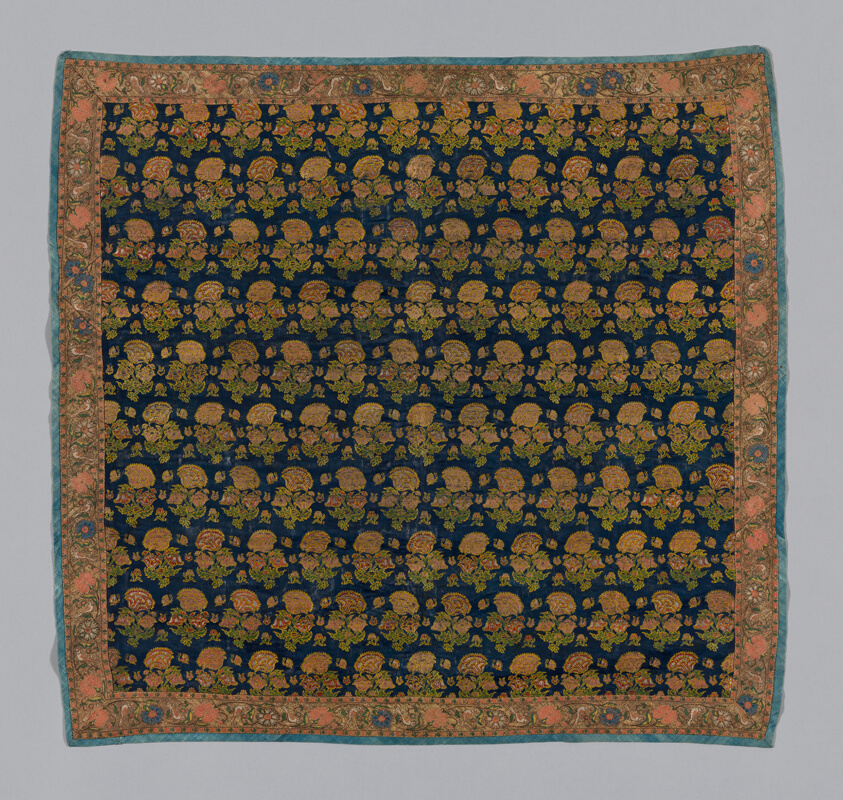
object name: Textile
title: Panel (Dress Fabric)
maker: Iran (Persia)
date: 18th/19th century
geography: Iran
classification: textile; weaving